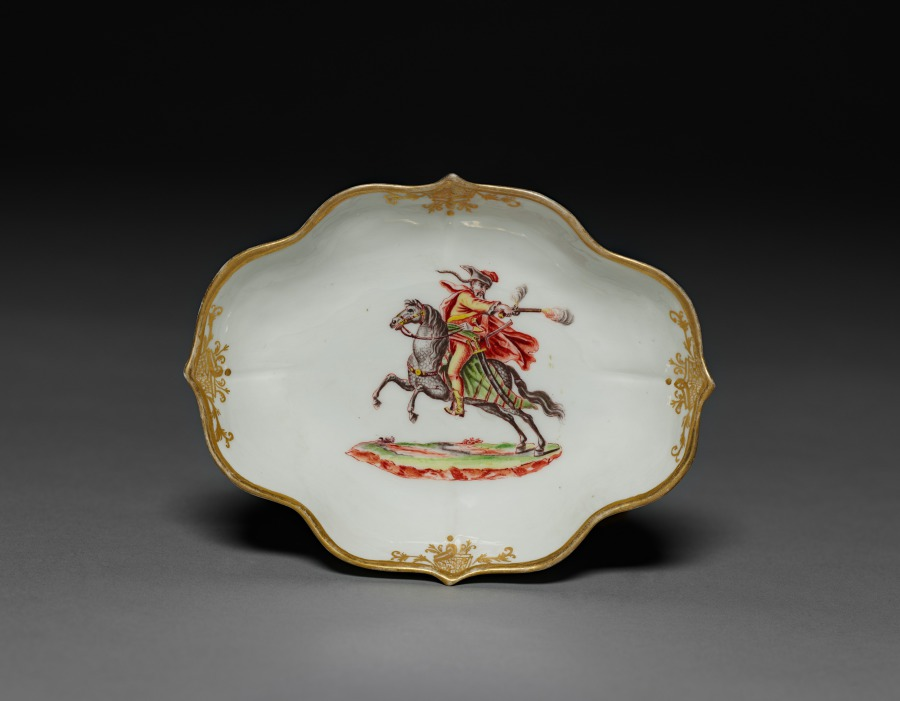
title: Dish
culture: Germany, Meissen, 18th century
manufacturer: Meissen Porcelain Factory (German, est. c. 1710)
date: c. 1750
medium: porcelain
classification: Ceramic